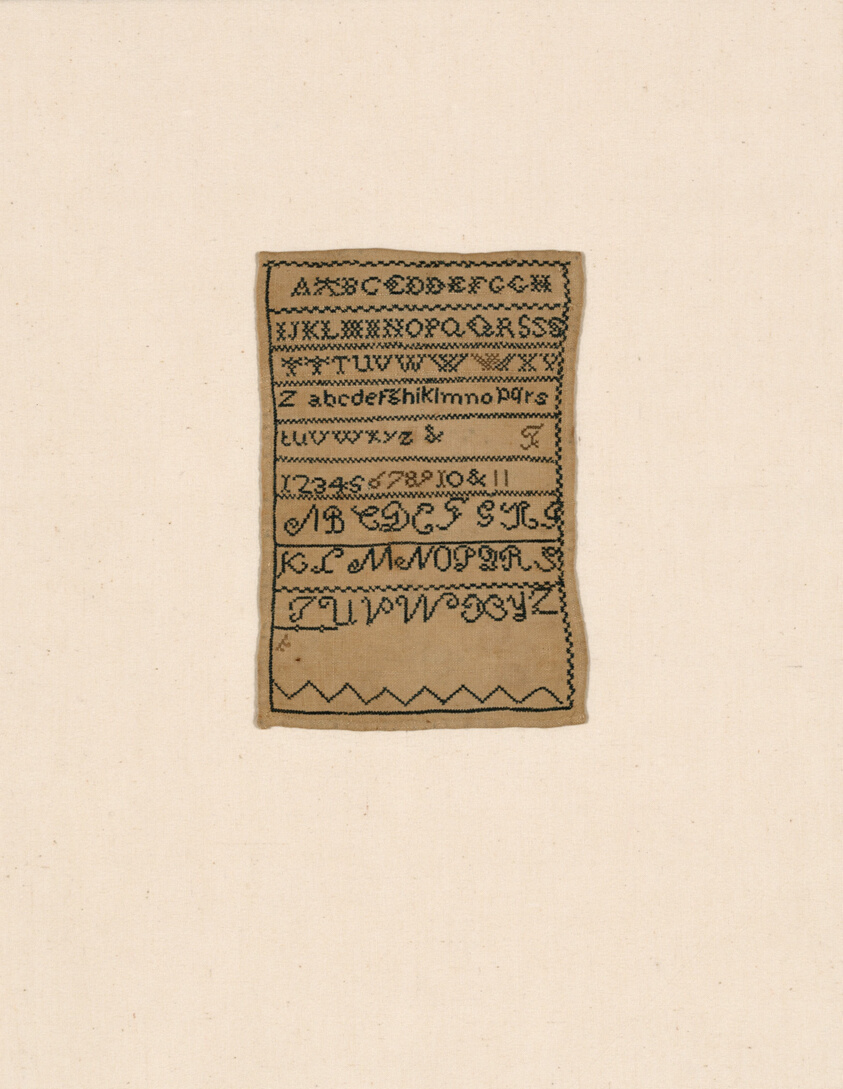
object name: Textile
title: Sampler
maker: United States or England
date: 19th century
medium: Linen, plain weave; embroidered with silk in cross stitches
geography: United States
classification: textile; needlework (visual works); sampler